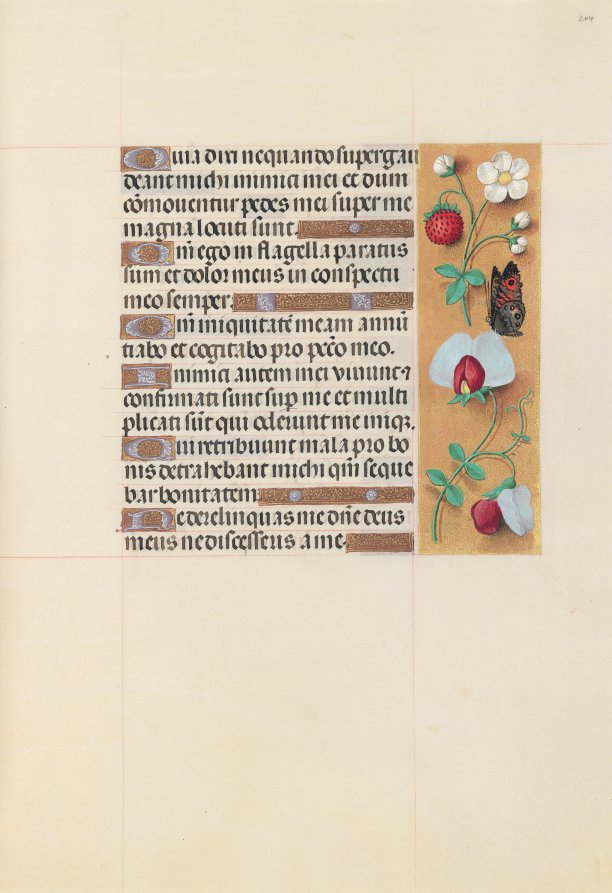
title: Hours of Queen Isabella the Catholic, Queen of Spain: Fol. 204r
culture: Flanders, Ghent and Bruges, late 15th century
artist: Master of the First Prayerbook of Maximillian (Flemish, c. 1444–1519)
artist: and Associates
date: c. 1500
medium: ink, tempera, and gold on vellum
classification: Bound Volume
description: This manuscript was illuminated by a circle of at least five highly organized manuscript painters active in the Flemish cities of Ghent and Bruges. The principal illuminator was Alexander Bening, who painted the majority of the book's miniatures. Manuscripts produced by this circle of artists are renowned for the decoration of their borders, which typically feature a rich variety of realistically-painted flowers, birds, and butterflies. This prayer book, called a book of hours, was intended not for a cleric, but for the private devotions of a lay person-in this case, Isabella the Catholic, Queen of Spain (1451-1504). Isabella's coat of arms embellishes the book's frontispiece. It is unlikely that the book was commissioned by the Queen herself; rather, she probably received it as a diplomatic gift from someone courting her patronage, perhaps Cardinal Francisco Jimenez de Cisneros. A Franciscan friar, Jimenez was dependent upon Isabella for his advancement, first to the post of Queen's confessor in 1492, and then to Archbishop of Toledo in 1495.